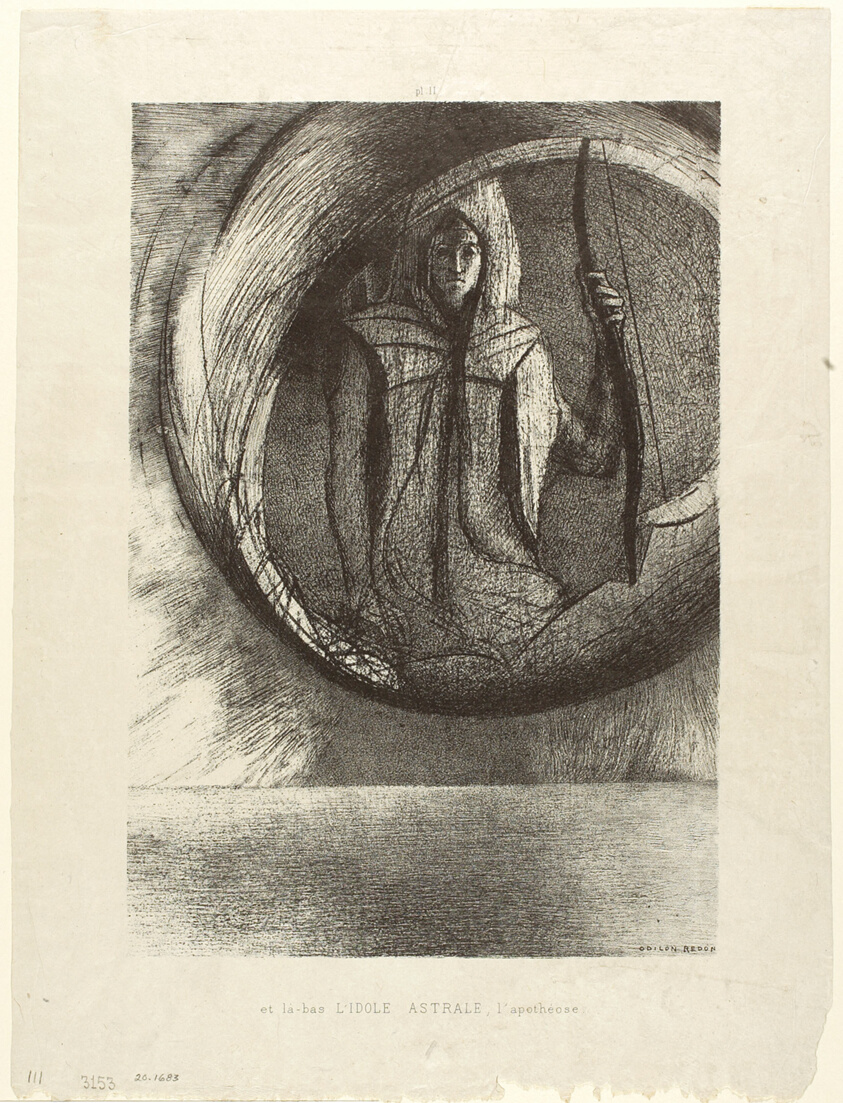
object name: Print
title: And Beyond, the Astral Idol, the Apotheosis, plate 2 of 6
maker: Odilon Redon (French, 1840-1916)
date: 1891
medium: Lithograph in black on light gray chine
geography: France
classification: lithograph; print; prints and drawing; paper